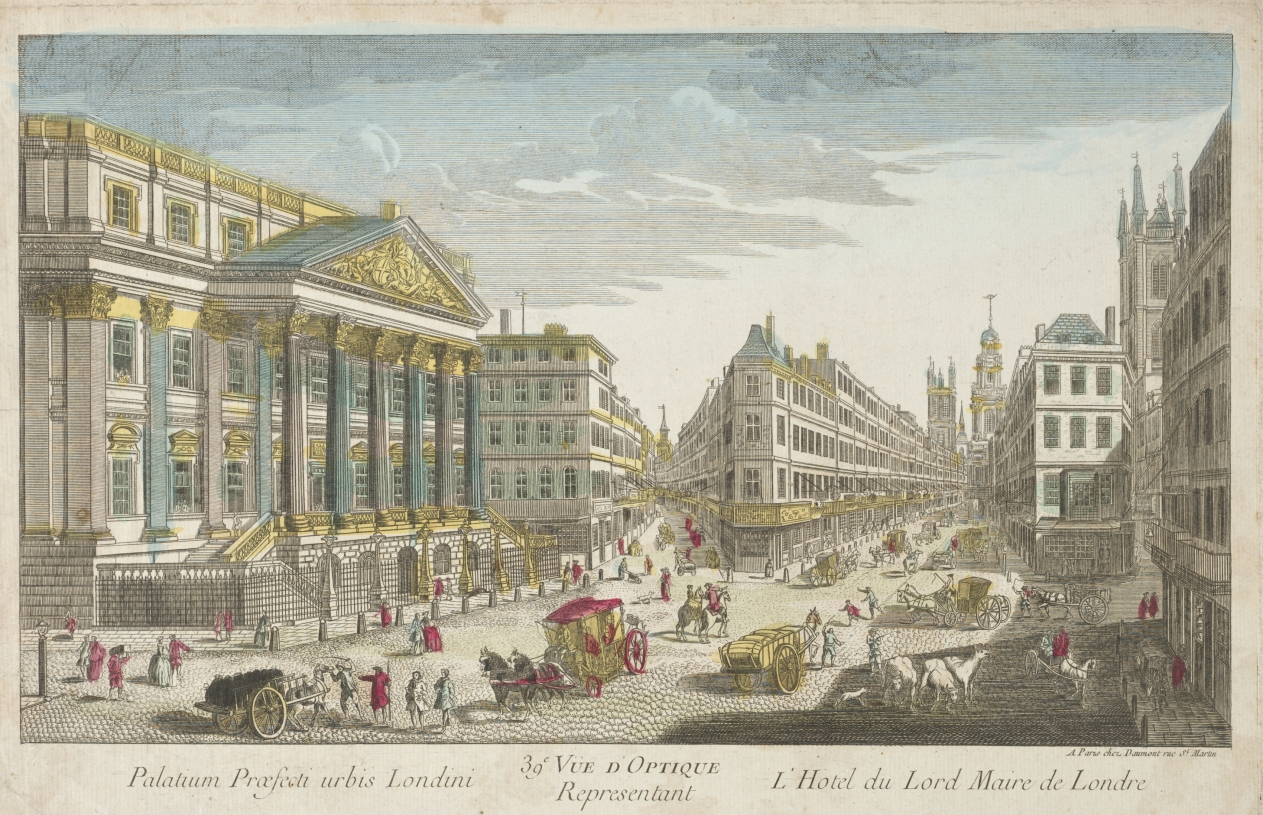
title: Residence of the Lord Mayor of London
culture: England, 18th century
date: 1700s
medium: Hand-colored engraving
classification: Print